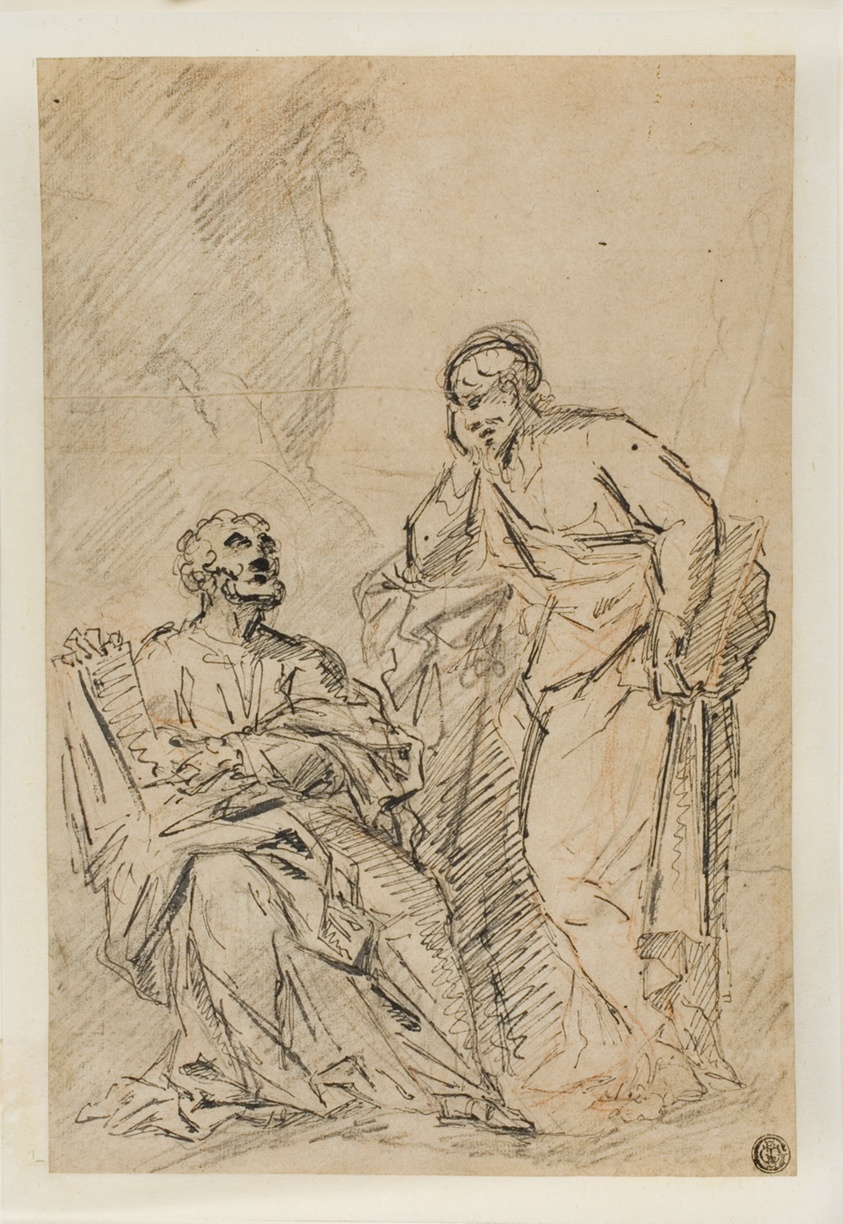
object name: Drawing and Watercolor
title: Two Philosophers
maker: Unknown Artist; French, 17th Century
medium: Pen and black ink, over red and black chalk, on tan laid paper, laid down on Japanese paper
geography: France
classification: pen and ink drawings; paper; drawings (visual works); prints and drawing